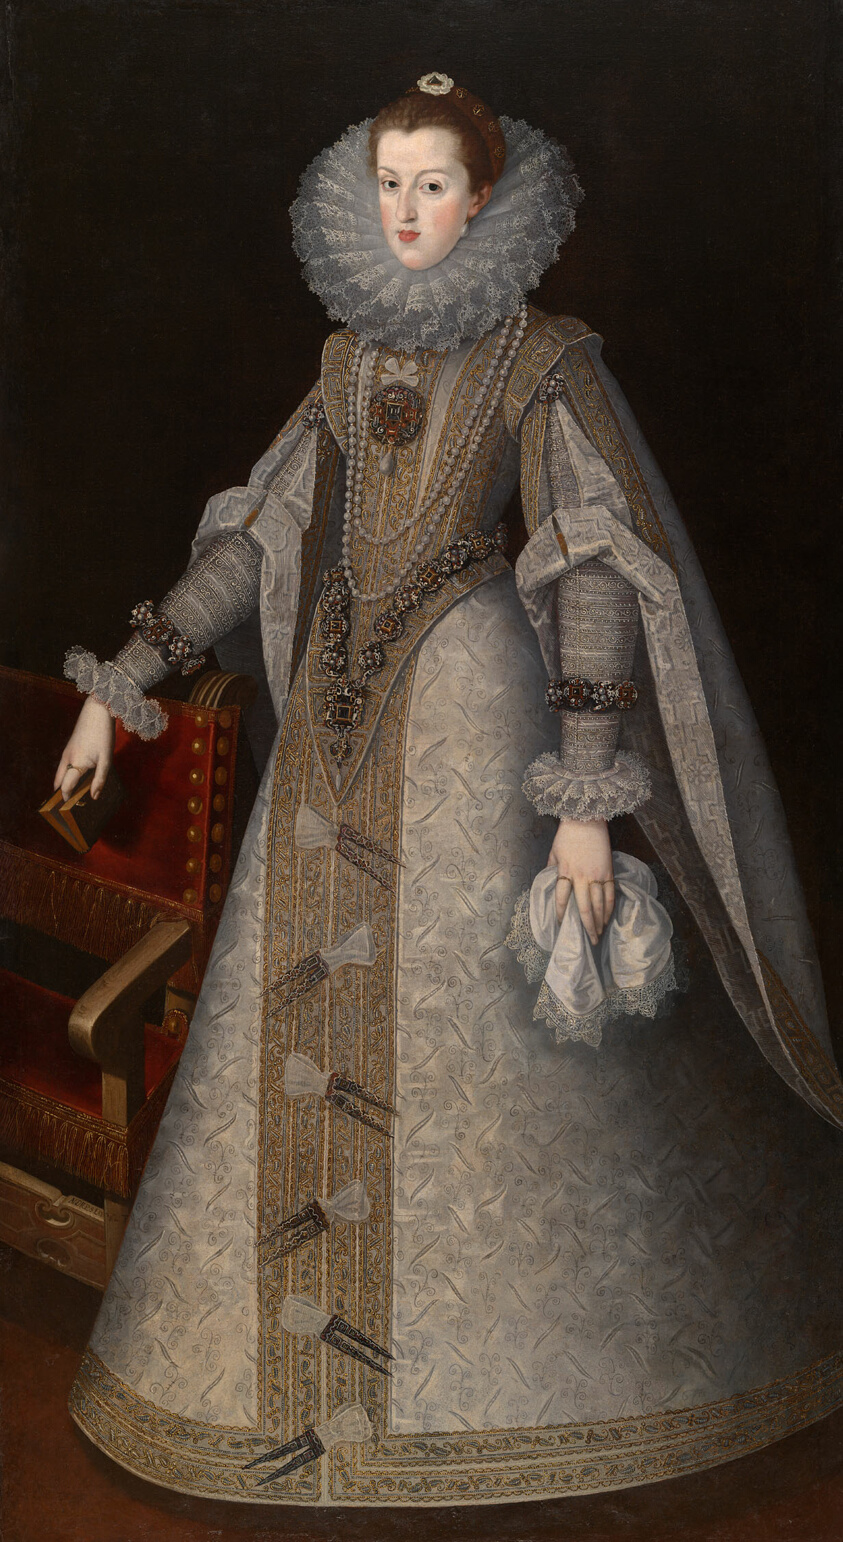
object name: Painting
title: Queen Margaret of Spain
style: 17th Century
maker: Andrés López Polanco (Spanish, active 1608, died 1641)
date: c. 1610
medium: Oil on canvas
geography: Spain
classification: oil on canvas; oil paintings (visual works); paint; portrait; spanish; painting; european painting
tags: portraits: female subject, pearls, chair, lace, jewelry, Spain, queens, nobility, luxury, portraits, portrait